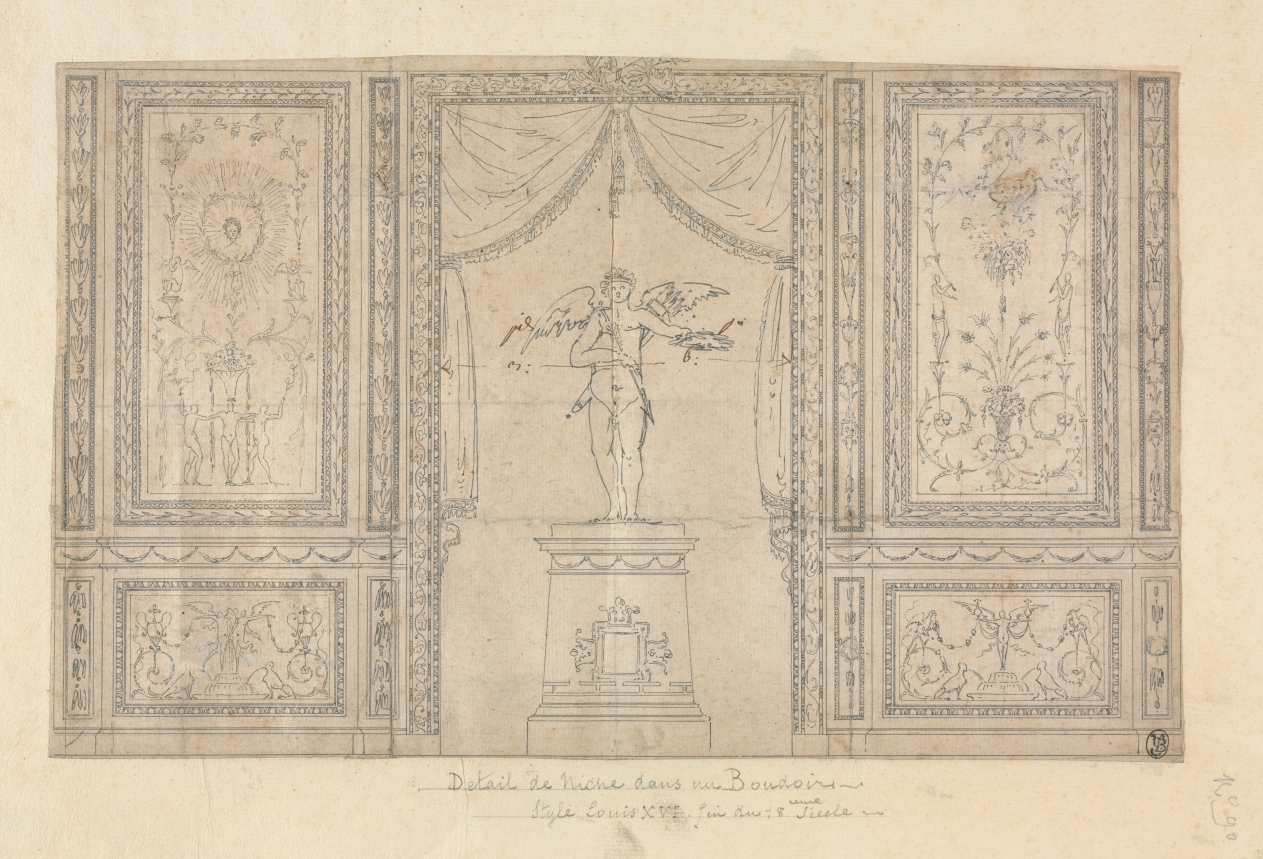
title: Statue of Cupid in a Wall Niche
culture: Italy, late 18th Century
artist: Paolo Vincenzo Bonomini (Italian, 1757–1834)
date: late 1700s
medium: pen and black ink (ruled in places) with traces of graphite, heightened with traces of white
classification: Drawing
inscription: by artist(?), center, in brown ink: [pieds?] [illegible] / <-------- 3: ----------------- 6: ------------> ; RECTO OF SECONDARY SUPPORT, lower center, in graphite: Detail de Niche dans un Boudoire~ / Style Louis XVI . fin du 18 eme Siecle ~ ; lower right, in graphite: N° 90 [sideways] ; VERSO OF SECONDARY SUPPORT, printed in black on separately applied piece of paper: 59 ; on same sheet, in brown ink: A[P?]